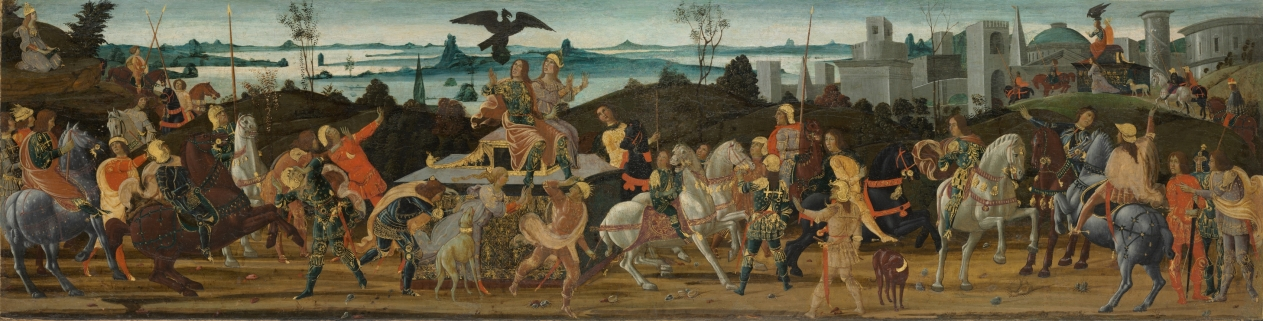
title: Tarquinius Priscus Entering Rome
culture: Italy, late 15th Century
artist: Jacopo del Sellaio (Italian, c. 1441–1493)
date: c. 1470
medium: tempera on wood, mounted on canvas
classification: Painting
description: Originally the front of a bridal chest, this panel was later removed and framed like a painting. At left, the Etruscan prophetess Tanaquil foresees her husband’s entry into Rome. En route, an eagle snatched his hat, then returned it as they approached the city, which Tanaquil interpreted as a good omen. Ancient triumphal processions, closely connected to ancient sarcophagi, were common subjects for bridal chests. Here Tanaquil is a model for a supportive, dutiful wife.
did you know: This painting utilizes continuous narrative; the same figures appear multiple times as the story unfolds from left to right.